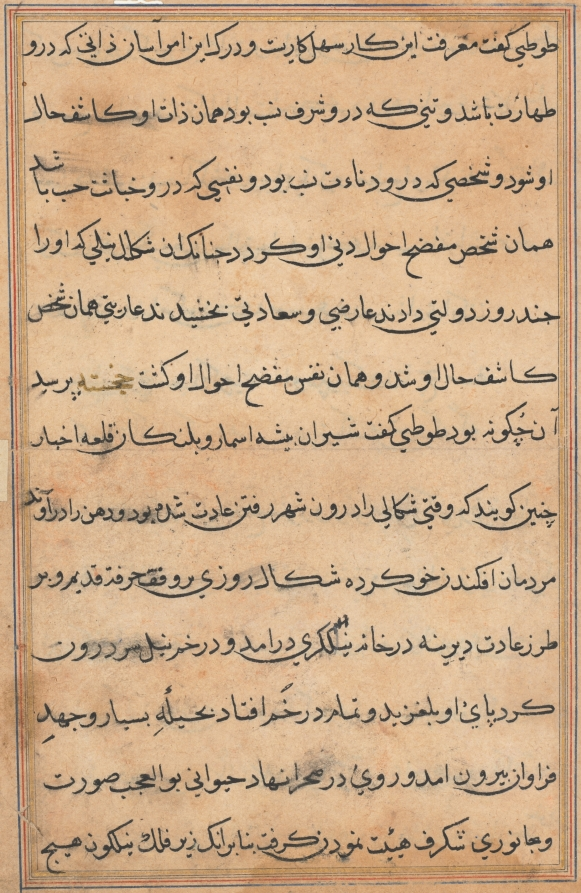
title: Page from Tales of a Parrot (Tuti-nama): text page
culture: Mughal India, court of Akbar (reigned 1556–1605)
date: c. 1560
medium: gum tempera, ink, and gold on paper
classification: Painting